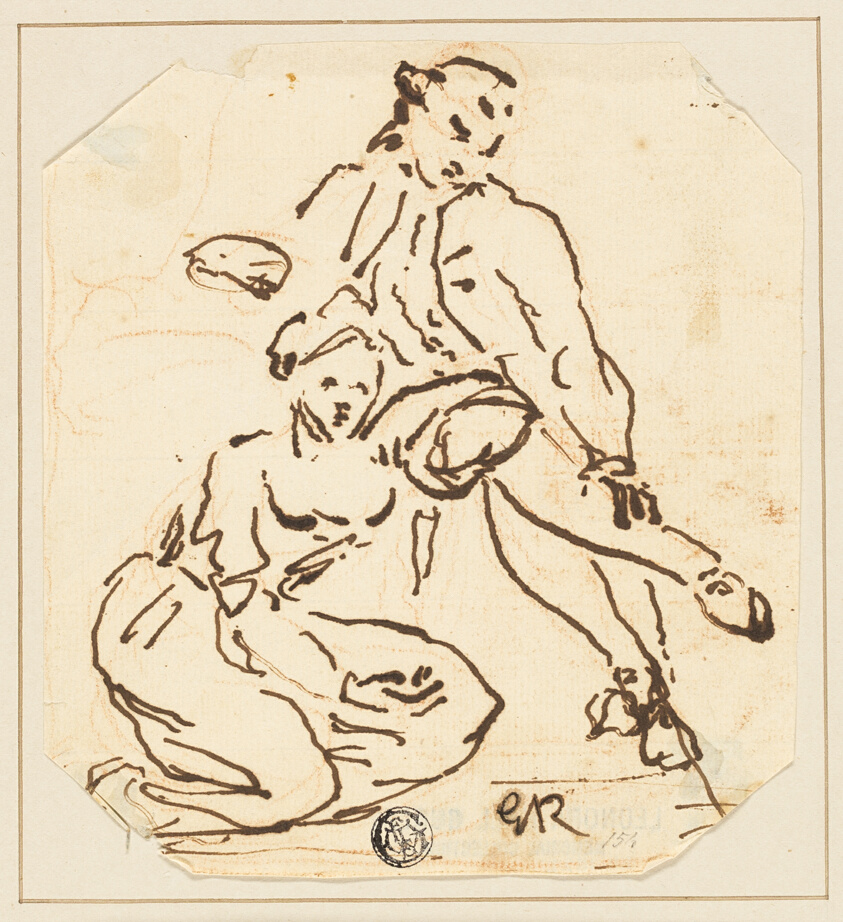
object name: Drawing and Watercolor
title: Seated Man and Woman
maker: Unknown Artist; British, eighteenth century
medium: Pen and brown ink,over red chalk, on ivory laid paper, tipped onto board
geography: Great Britain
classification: pen and ink drawings; drawings (visual works); prints and drawing